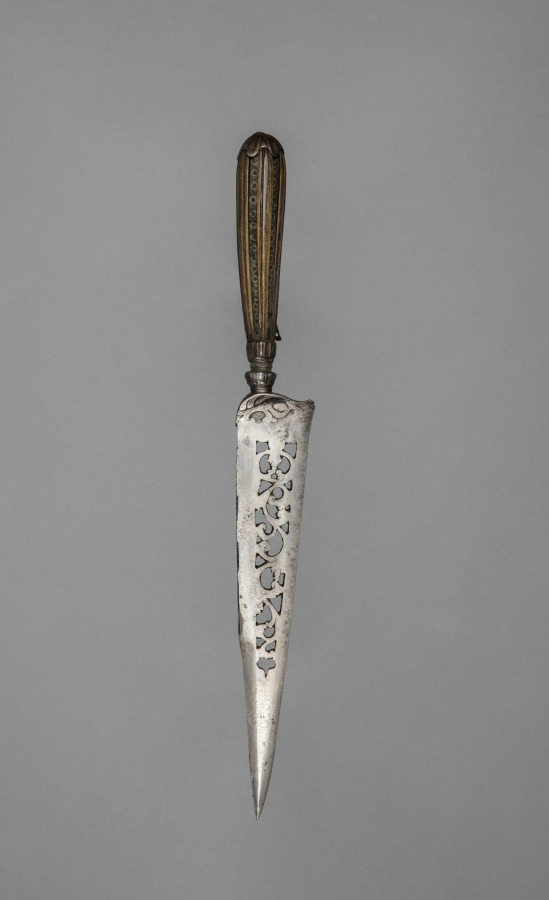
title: Knife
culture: Spain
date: 1700s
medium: steel blade, groove horn handle with sunken silver bands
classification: Arms and Armor